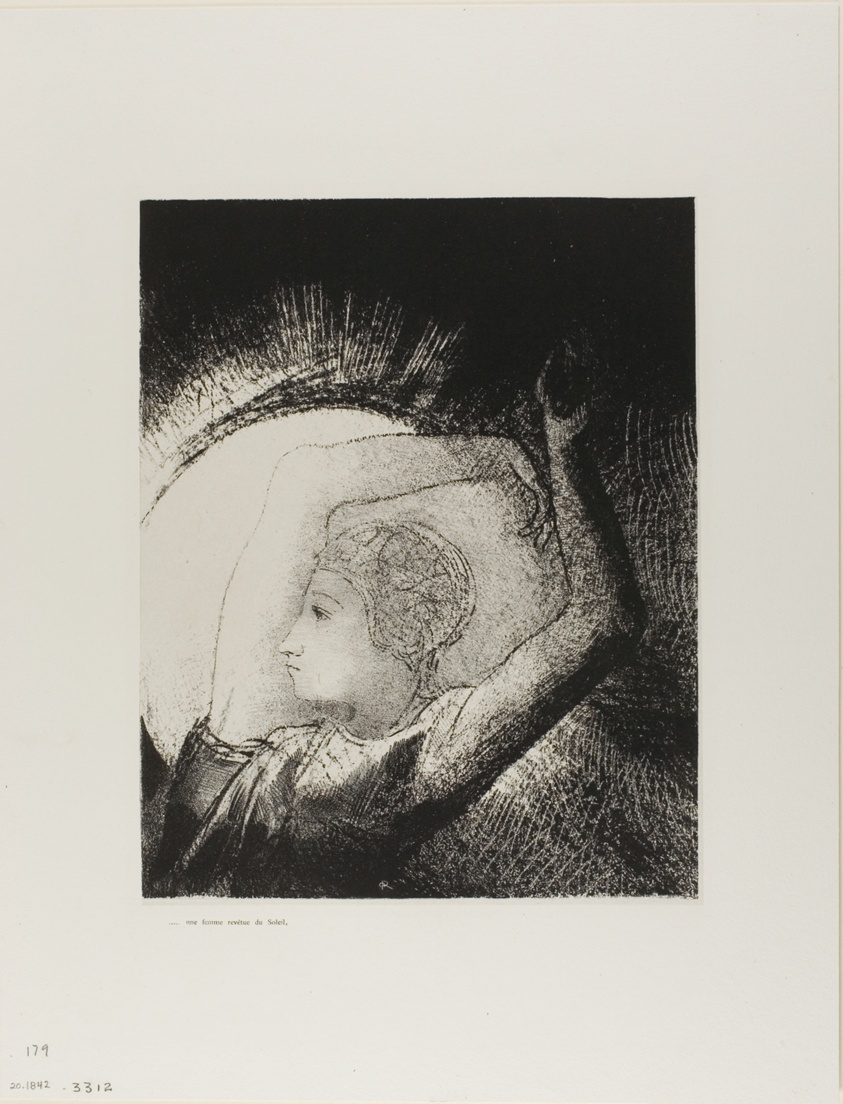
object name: Print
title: A Woman Clothed With the Sun, plate 6 of 12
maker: Odilon Redon (French, 1840-1916)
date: 1899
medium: Lithograph in black on cream China paper laid down on ivory wove paper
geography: France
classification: lithograph; print; prints and drawing; paper